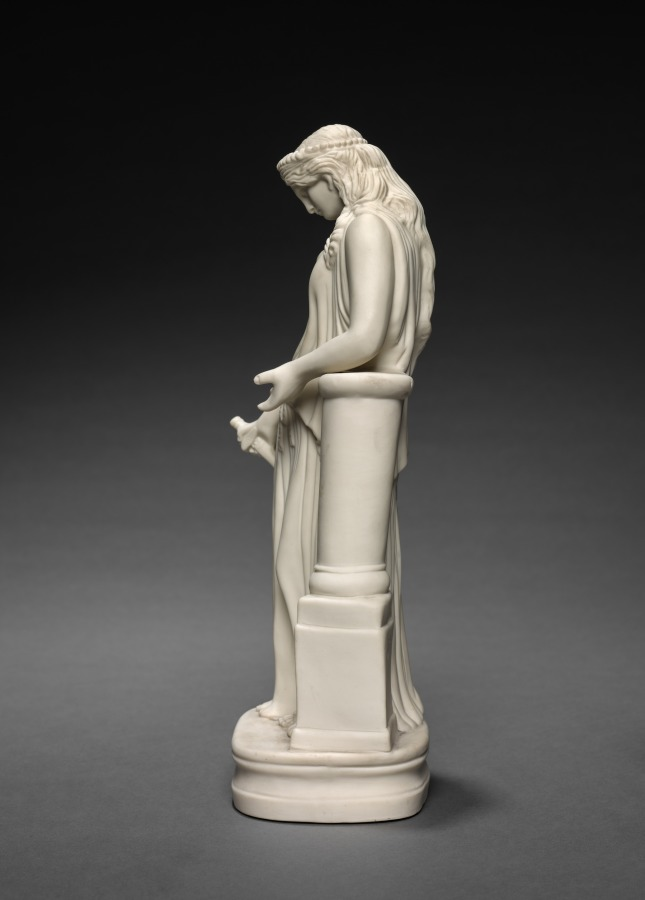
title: Figure of Medea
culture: England, 19th century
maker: W. T. Copeland & Sons (British)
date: c. 1870–1890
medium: Parian porcelain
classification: Ceramic